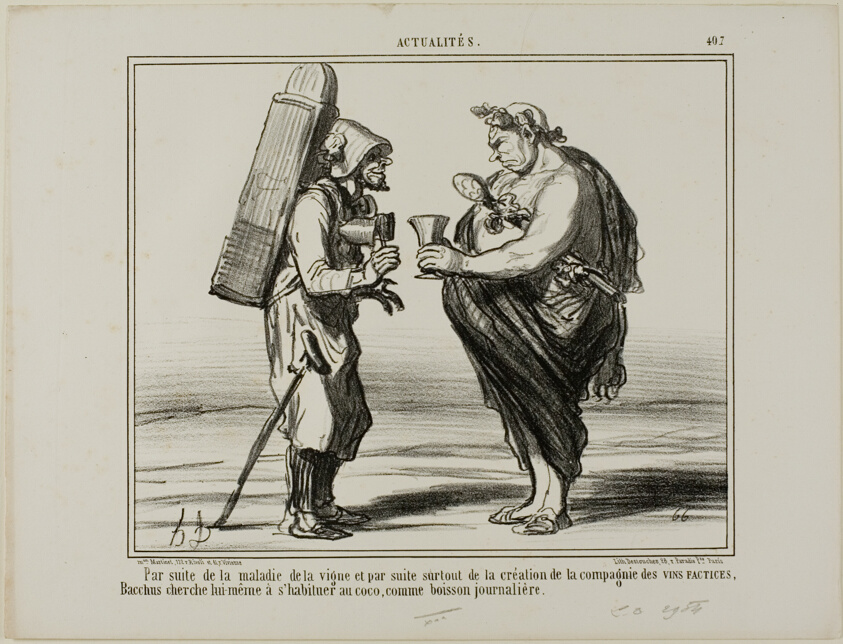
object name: Print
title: As a consequence of the wine disease but also because of the foundation of the "Society for the Production of Artificial Wine", even Bacchus decides to switch to coconut water as a daily drink, plate 407 from Actualités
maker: Honoré Victorin Daumier; French, 1808-1879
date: 1857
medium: Lithograph in black on white wove paper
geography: France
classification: lithograph; print; prints and drawing